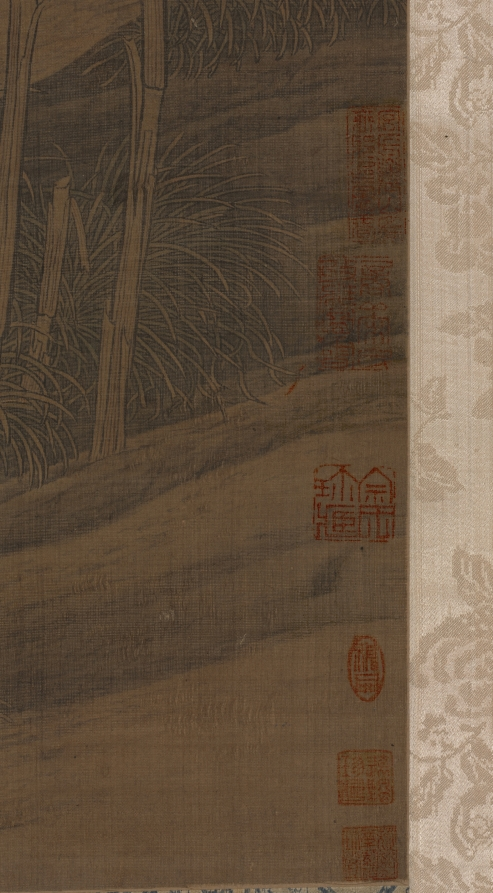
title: Ducks under Reeds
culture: China, Ming dynasty (1368–1644)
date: 1400s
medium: hanging scroll, ink and color on silk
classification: Painting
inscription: 1 label on mounting, dated 1796, by Yong Xing 永瑆 (Prince Cheng 成亲王, 1752-1823)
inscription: 7 seals: 1 of Song Luo 宋犖 (1634-1713); 1 of Gong Erduo 宮爾鐸 (b. 1838); 5 unidentified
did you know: The artist realistically represented that the Mandarin duck is a sexually dimorphic species, meaning males and females differ in appearance.